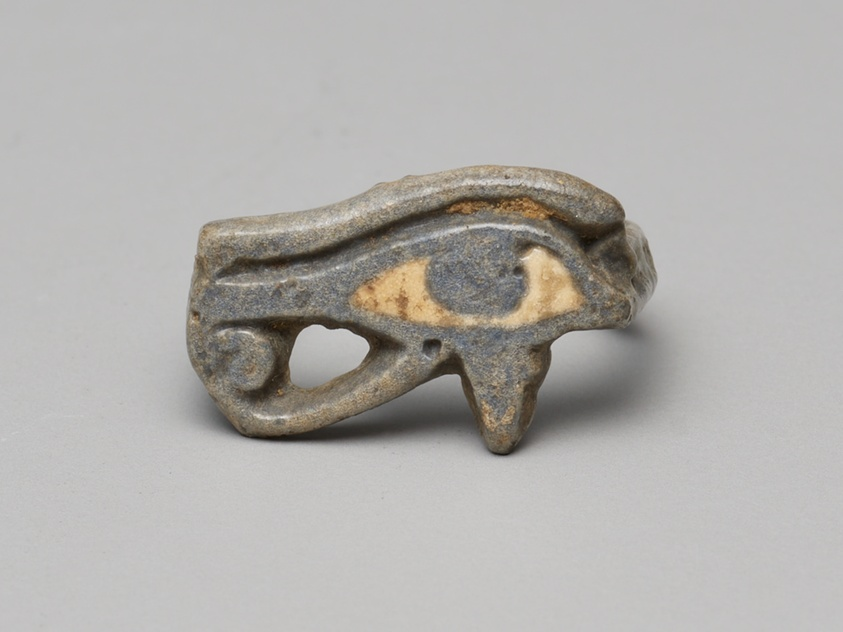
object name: Costume and Accessories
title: Eye of Horus (Wedjat) Finger Ring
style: new kingdom, egyptian, ancient, eighteenth dynasty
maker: Egyptian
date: late Dynasty 18, about 1390–1295 BCE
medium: Faience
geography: Egypt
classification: ring (jewelry); ceramics; jewelry; ancient art; costume; faïence (composite material)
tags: eye of Horus, eyes, Hieroglyphs